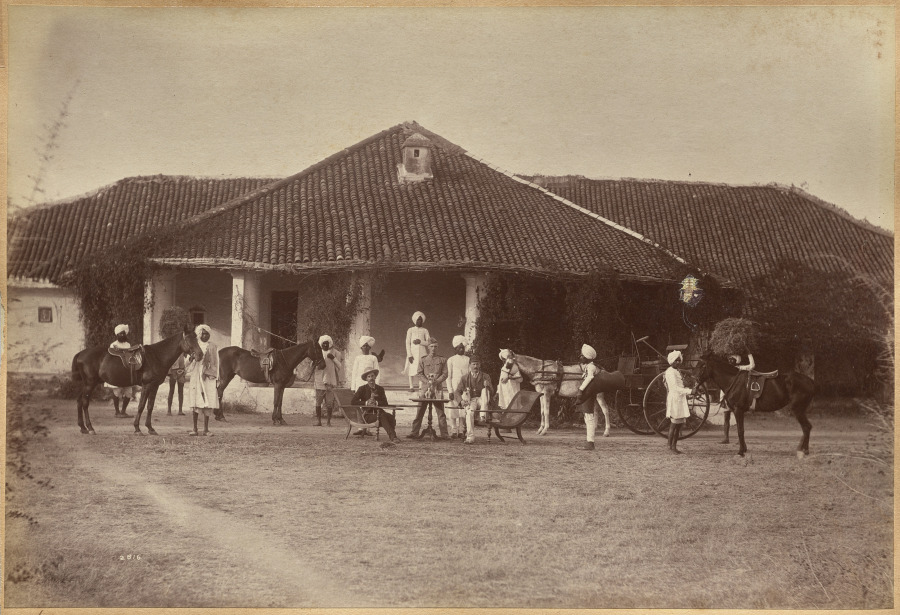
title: Dr. Morris and party, Jhansi (recto)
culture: India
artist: Raja Deen Dayal (Indian, 1844–1905)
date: c. 1882–87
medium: albumen print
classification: Photograph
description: These photographs are part of an album, now disassembled, of around 105 photographs taken in India between 1885 and summer 1887 that provide glimpses into the lives of the British colonial elite and royal and upper-class Indians. The museum holds another group of 37 pictures from this album (2016.266), which was probably commissioned by a British civil servant visiting or working in India around 1888 as a personal souvenir of his experiences there.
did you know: Raja Deen Dayal is regarded now, and was considered during his lifetime, to be India’s most important 19th-century photographer.